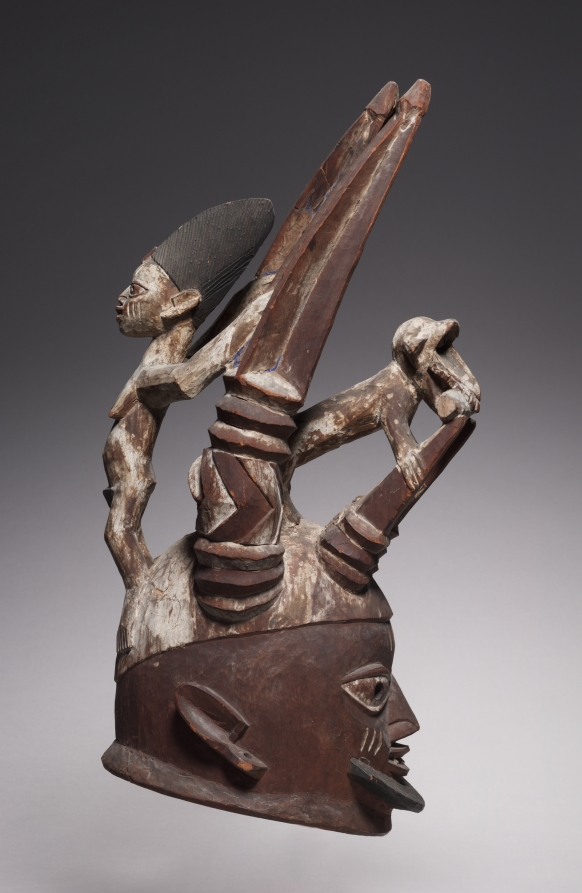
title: Helmet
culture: Africa, West Africa, Nigeria, Yorùbá-style maker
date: late 1800s–early 1900s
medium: Wood and paint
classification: Mask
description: This type of helmet used by the Oro association, is often mistaken for the more common Egungun. While Egungun masquerades are performed to honor an individual's ancestors, Oro masquerades are performed in conjunction with the actual funeral of a Yoruba person. The Oro association is very secretive, and the visibility of helmets like this one is generally restricted. Oro is also responsible for carrying out criminal sentences, such as collecting fines, repossessing goods, and executing those convicted of a capital crime. The female figure suspended from the back of the horns may reference the victims of Oro executions. This work has been attributed to the Esubiyi School of Abeokuta, founded about 1860.